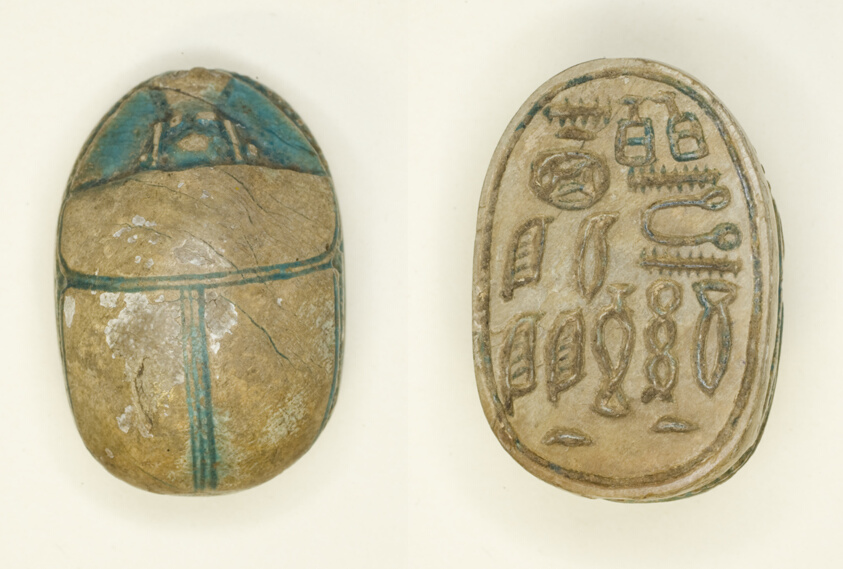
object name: Costume and Accessories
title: Scarab: Titles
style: middle kingdom, egyptian, ancient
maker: Egyptian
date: Middle Kingdom, Dynasties 11–14 (about 2055–1650 BCE)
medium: Glazed steatite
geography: Egypt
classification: scarab; ancient art; costume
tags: Hieroglyphs, insects